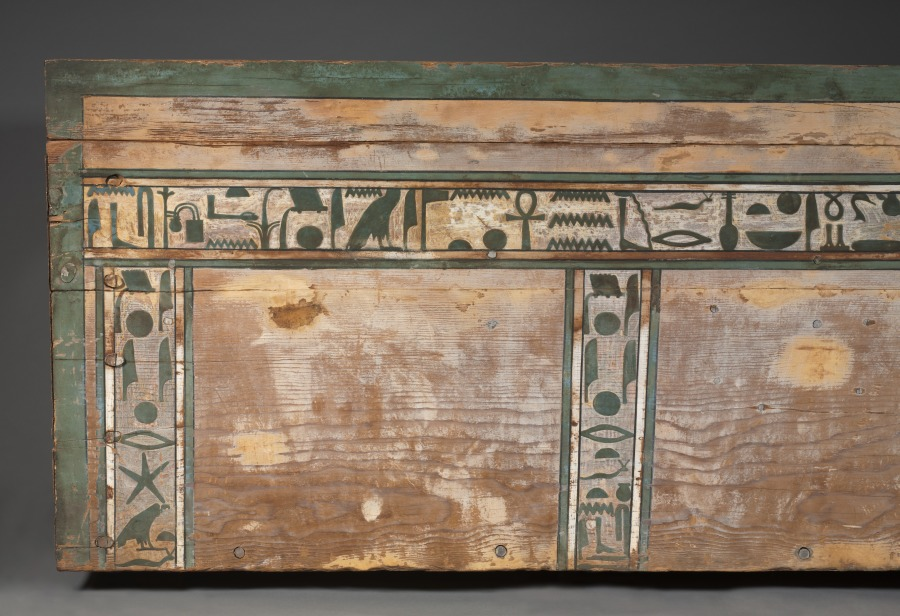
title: Coffin of Senbi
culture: Egypt, Meir, Middle Kingdom, mid-Dynasty 12, reign of Amenemhat II to Sesostris III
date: c. 1918–1859 BCE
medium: gessoed and painted cedar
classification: Funerary Equipment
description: The most common type of coffin during the Middle Kingdom took the shape of a rectangular box with lid. The mummy inside was placed on his left side, facing east, his head behind the two magical eyes. These—in the shape of human eyes, to which have been added the markings of a falcon's head—were supposed to enable him to behold the rising sun, reborn daily. The long horizontal inscriptions are prayers to Anubis (god of embalming) and Osiris (god of the dead) for offerings of food and drink and other items necessary for survival in the afterlife. The short vertical inscriptions place him under the protection of the gods of earth, sky, air, and moisture, as well as various funerary deities.